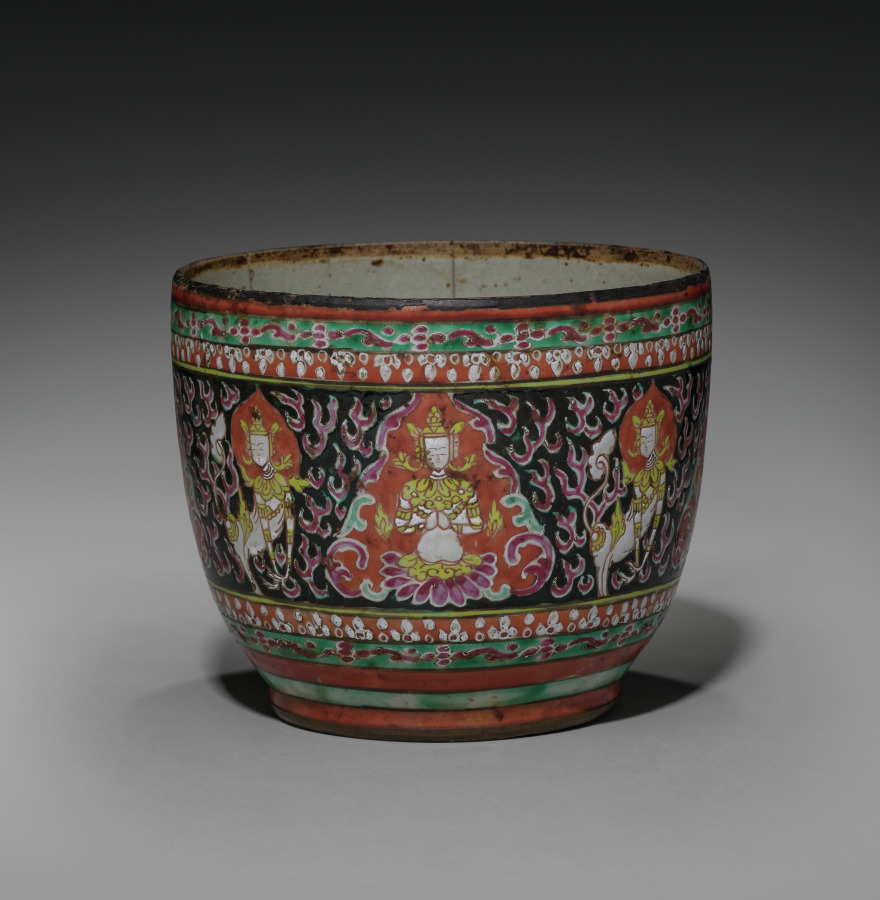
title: Jar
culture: Siam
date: 1800s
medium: porcelain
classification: Ceramic